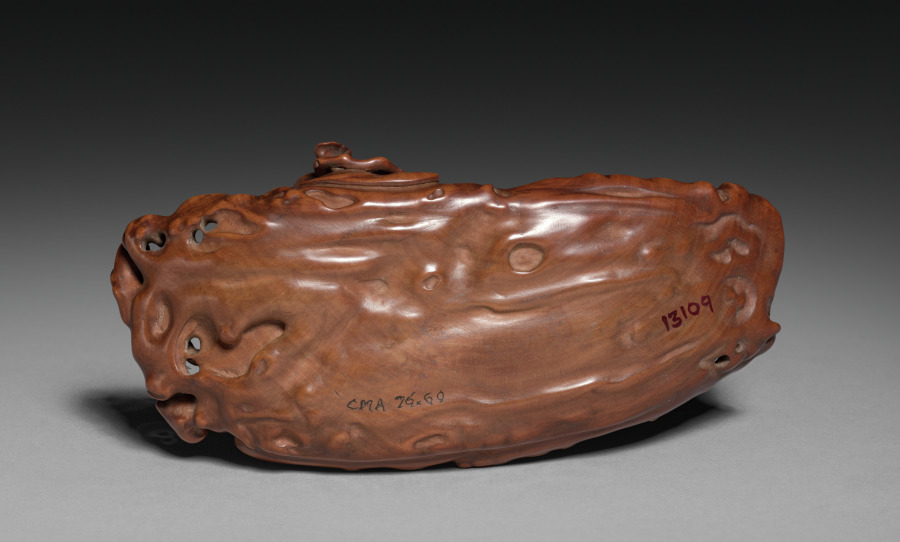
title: Figure of Daoist Immortal He Xiangu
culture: China, Qing dynasty (1644-1911)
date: 1700s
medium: Boxwood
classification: Wood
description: He Xiangu is one of the Eight Immortals in the Daoist pantheon. She was thought to have been a real person who lived in the Tang dynasty, originally named He Qiong. As a teenager, she was instructed in a dream to eat powdered mica to become immune from death and to vow to remain unmarried. She did so and became an enlightened practitioner of Daoism. In this delicate carving, He Xiangu is placidly seated in a gnarled and knotty wooden raft amid green-tinted ivory waves. In front of her rests a bamboo basket filled with objects associated with Daoist immortality, and she holds a branch of lingzhi fungus like an oar.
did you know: The lingzhi she holds is a woody mushroom often used in traditional Chinese medicine and associated with immortality.